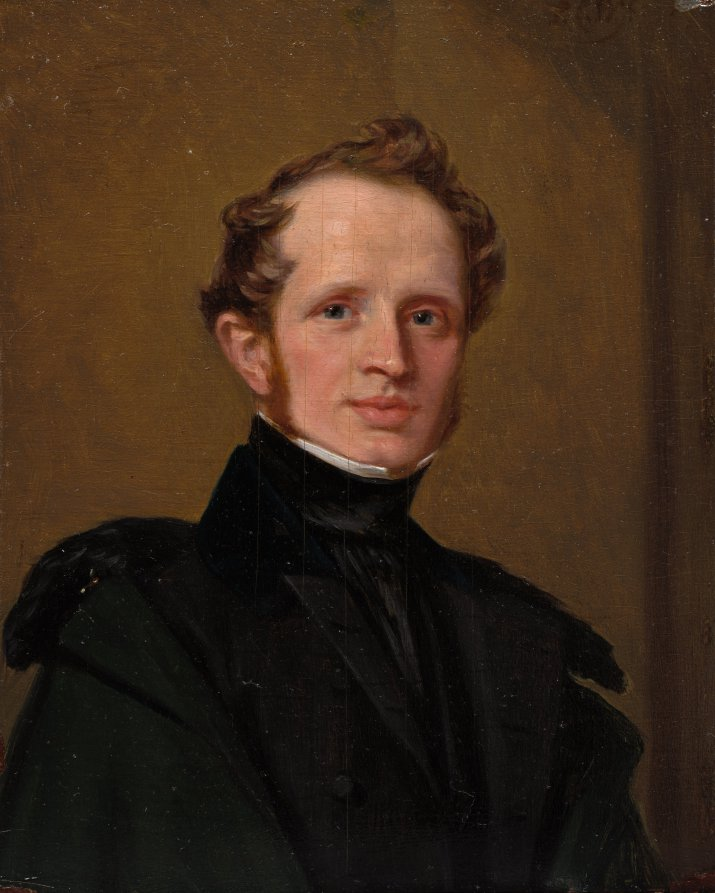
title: Henry Francis Playter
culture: Netherlands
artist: Pieter Christoffel Wonder (Dutch, 1780–1852)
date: c. 1837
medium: oil on wood panel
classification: Painting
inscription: Signed in brown paint in upper right corner: P.C.W. f